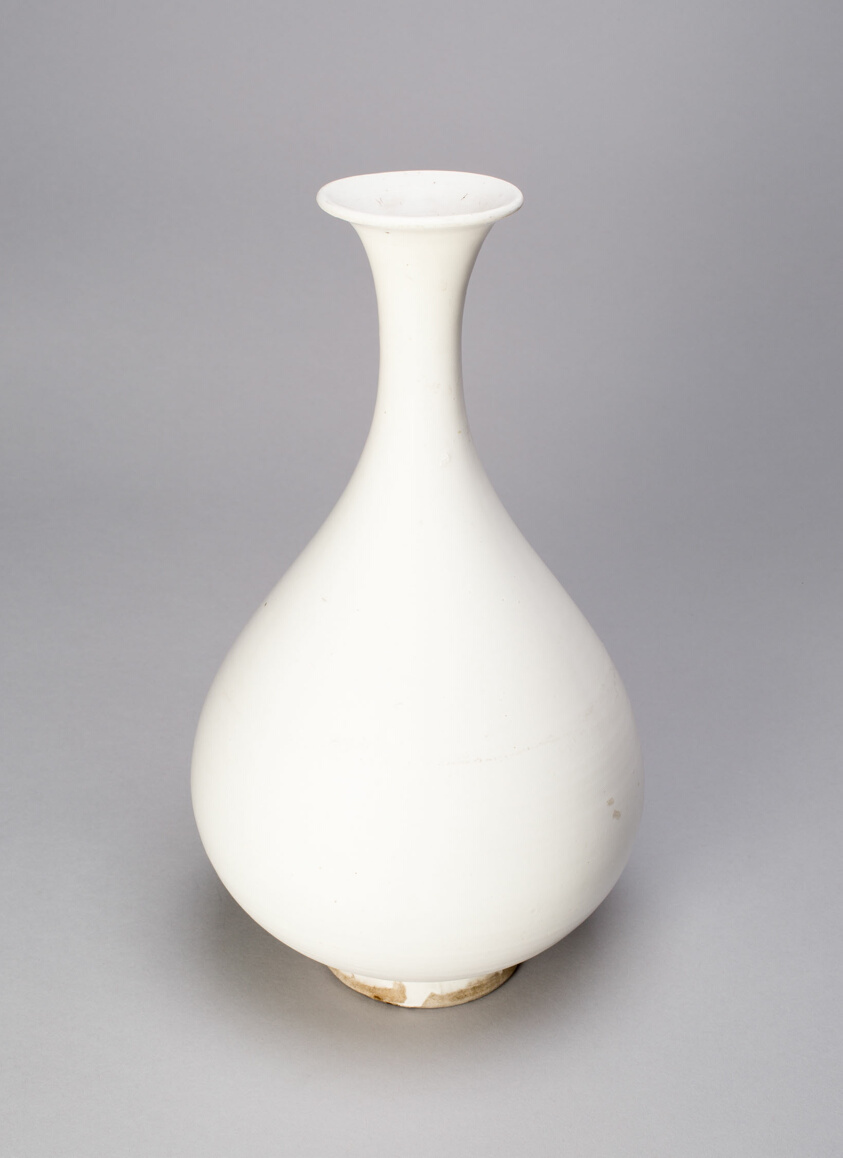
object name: Vessel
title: Pear-Shaped Vase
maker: China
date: Jin dynasty (1115–1234)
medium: Porcelain with creme white glaze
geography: China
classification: porcelain; asian art; ceramics